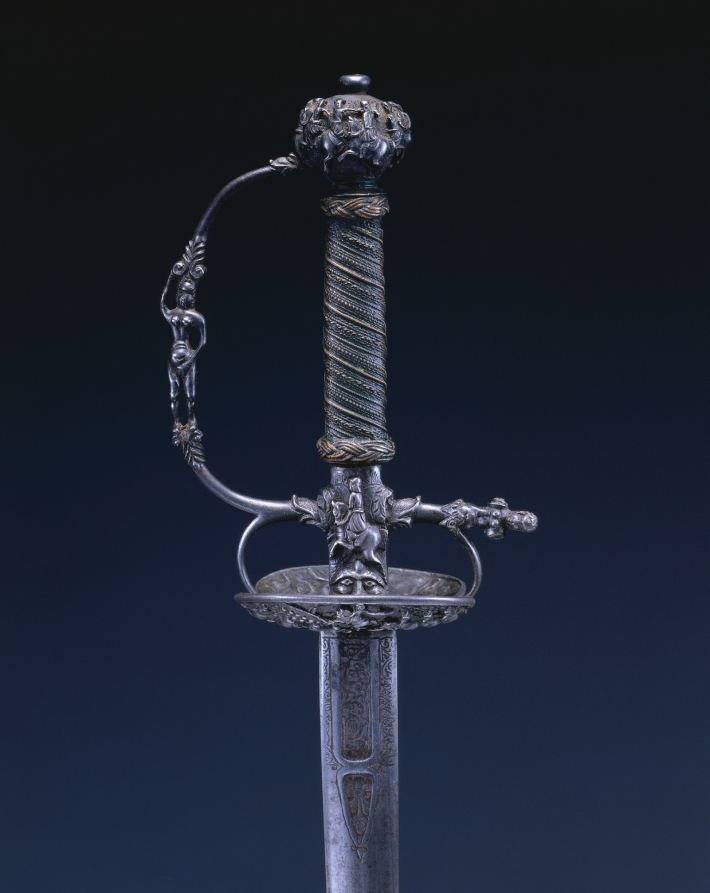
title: Small Sword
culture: Netherlands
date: c.1650–60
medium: steel, wood, copper wire; chiseled hilt; engraved blade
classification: Arms and Armor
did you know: Despite its small size the hilt and handle of this sword include numerous details, both figurative and geometric. Look for men on horseback, nude women, and a battle scene.